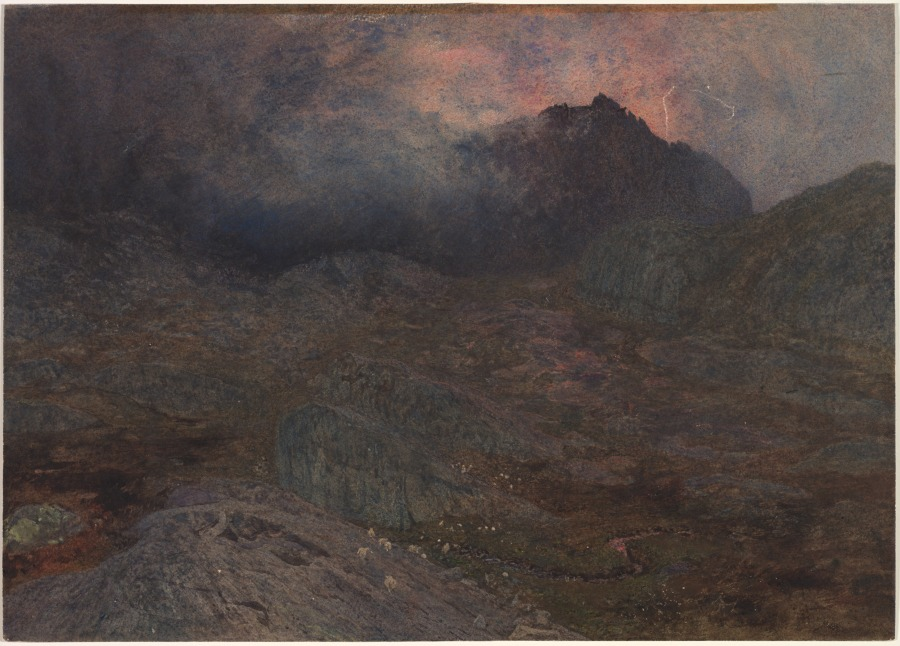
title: Cwm Trifaen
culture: England, 19th century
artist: Alfred William Hunt (British, 1830–1896)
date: c. 1857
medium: watercolor with gouache and scratching out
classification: Drawing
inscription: Inscribed on the back of the support in graphite: Cwm Trifaen/By AW Hunt/painted about 1857/exhibited 1864-65.